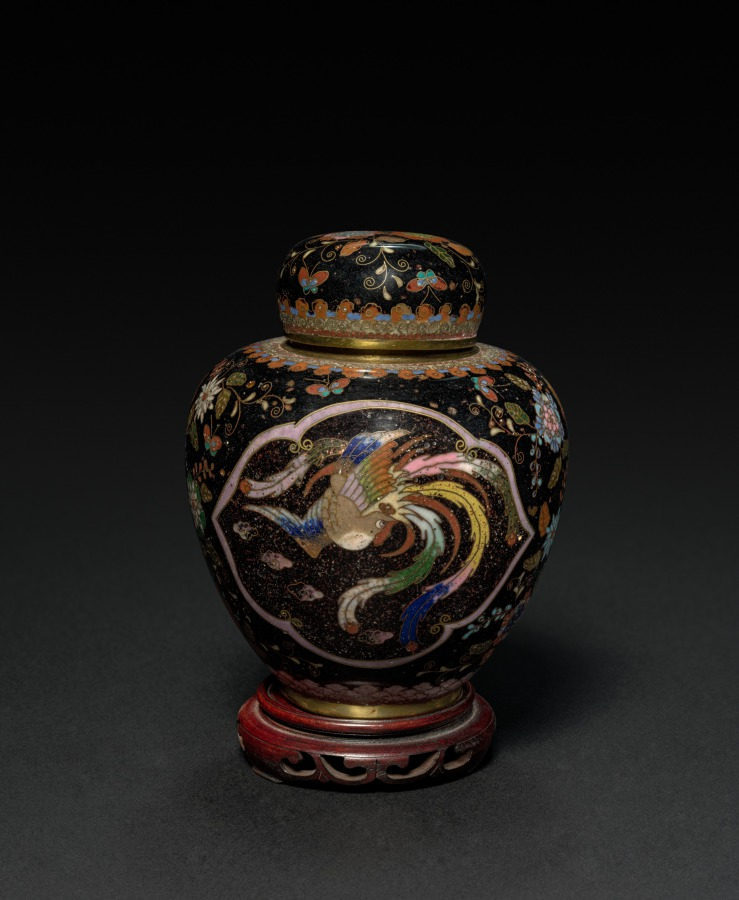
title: Ginger Jar with Phoenix and Dragon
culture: Japan, Meiji period (1868–1912) or Taishō period (1912–26)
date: early 1900s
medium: cloisonne enamel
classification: Enamel